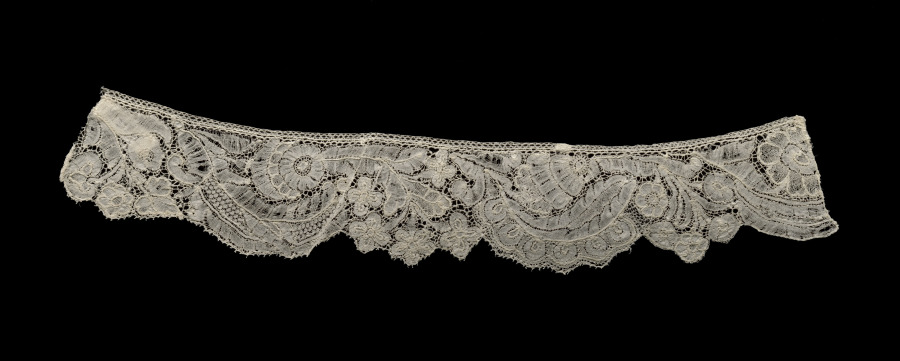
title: Lace Edging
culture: England, Devonshire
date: 1740–60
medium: Bobbin lace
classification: Lace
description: Although made in Great Britain, this lace copies Brussels' Point d'Angleterre lace.